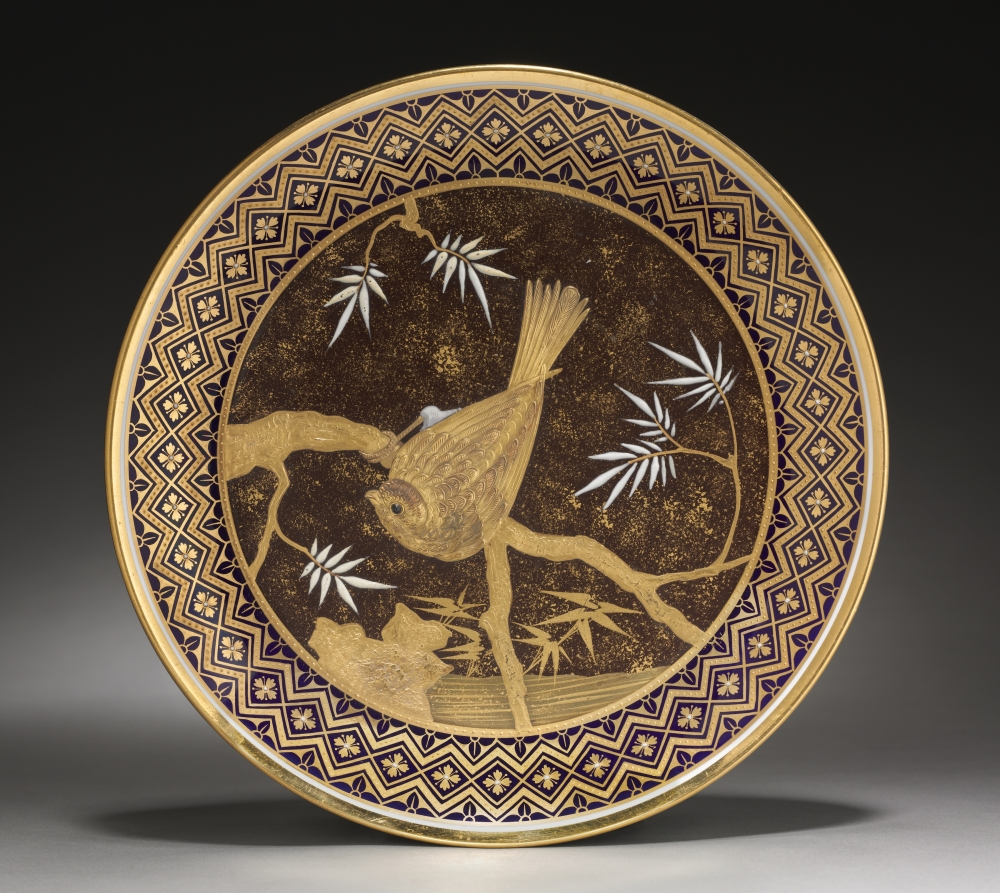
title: Cabinet Plate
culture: America, New York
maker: W. T. Copeland & Sons (British)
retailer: Tiffany & Co. (America, New York, est. 1837)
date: 1883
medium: porcelain with enamel pâte-sure-pâte and gilt decoration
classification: Ceramic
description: Pate sur pate or 'paste on paste' is a decorative technique for porcelain that involves painting primarily white clay slips on a dark background. After each layer has dried, successive layers are applied before being scraped and carved back to form the decoration in low relief.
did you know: W. T. Copeland was a British businessman and politician who served as Lord Mayor of London and a Member of Parliament.